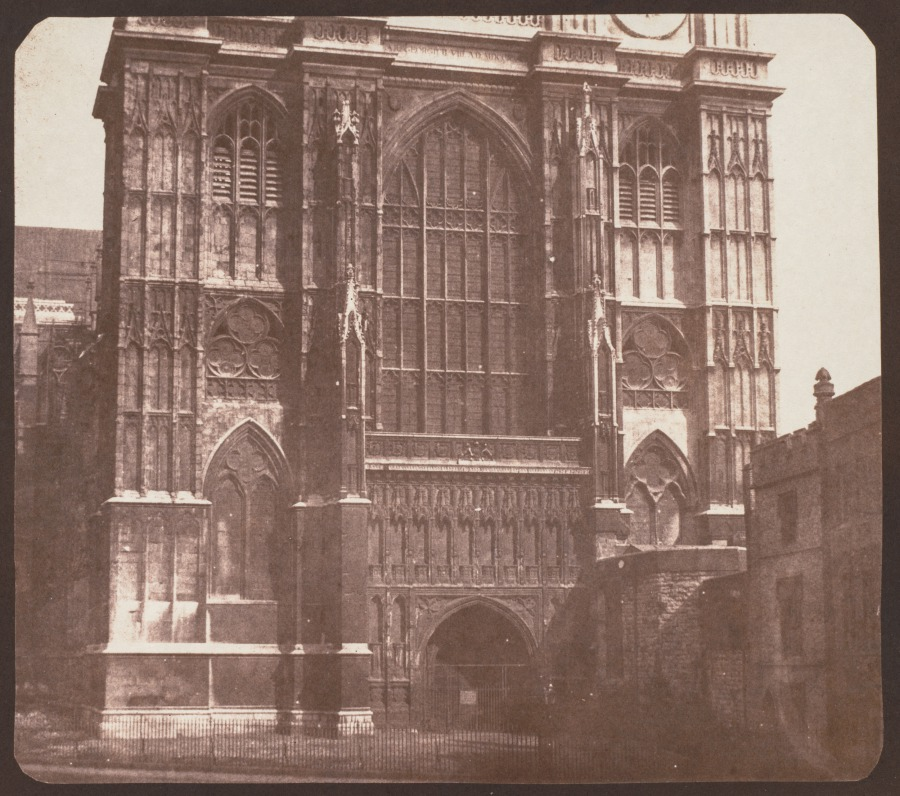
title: Westminster Abbey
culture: England, 19th century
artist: Nicholas Henneman (British, 1813–1898)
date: before 1844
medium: salted paper print from calotype negative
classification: Photograph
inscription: Written in ink on verso "LA22"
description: This rare image is the first photography by Henneman to enter the museum's collection. Its composition stresses the overall form as well as the details of the main entrance of London's Westminster Abbey. Instead of showing the entire building, Henneman selected a close vantage point to express his admiration of one of the greatest examples of early English architecture. Enlivened with strong light and shadow patterns, the sculptural and textural refinements of the building are clearly visible in this subtly toned photograph. Henneman became a key figure in the early history of photography through his association with the inventor of the calotype process, William Henry Fox Talbot (1800–1877). Beginning about 1841, Henneman made some of photography's earliest images and was the master printer for Talbot and a number of his close associates. Talbot even chose this picture to be included with 23 of his own images in his first photographically illustrated book, The Pencil of Nature (1844 to 1846).